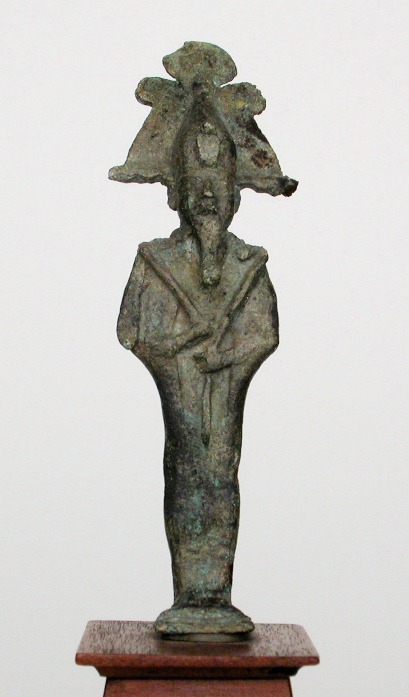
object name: Sculpture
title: Statuette of the God Osiris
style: third intermediate period, egyptian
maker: Egyptian; Bubastis, Egypt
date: Third Intermediate Period–Late Period, Dynasties 21–31 (about 1069–332 BCE)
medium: Bronze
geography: Egypt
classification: statuette; bronze; metal; sculpture; ancient art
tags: gods (deities)